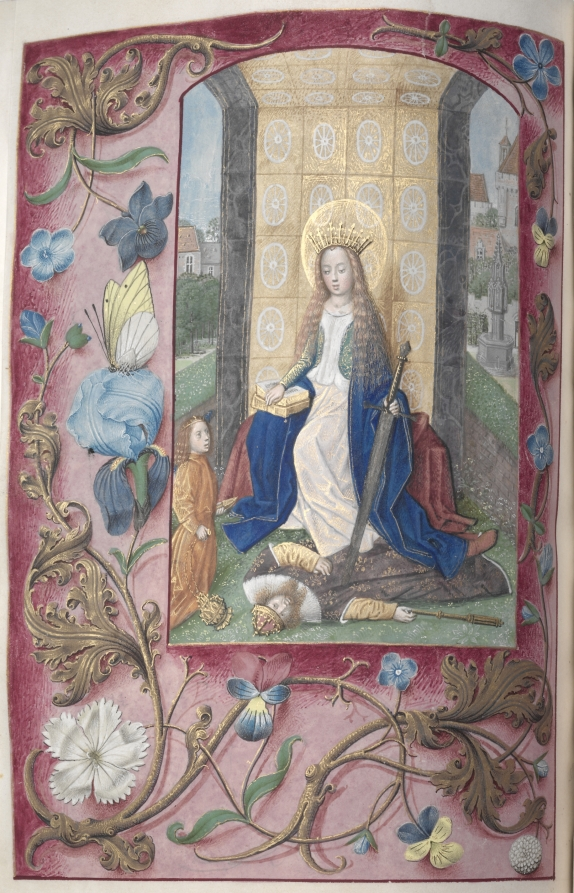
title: Hours of Queen Isabella the Catholic, Queen of Spain: Fol. 189v, St. Catherine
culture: Flanders, Ghent and Bruges, late 15th century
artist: Master of the First Prayerbook of Maximillian (Flemish, c. 1444–1519)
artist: and Associates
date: c. 1500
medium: ink, tempera, and gold on vellum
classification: Bound Volume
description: This manuscript was illuminated by a circle of at least five highly organized manuscript painters active in the Flemish cities of Ghent and Bruges. The principal illuminator was Alexander Bening, who painted the majority of the book's miniatures. Manuscripts produced by this circle of artists are renowned for the decoration of their borders, which typically feature a rich variety of realistically-painted flowers, birds, and butterflies. This prayer book, called a book of hours, was intended not for a cleric, but for the private devotions of a lay person-in this case, Isabella the Catholic, Queen of Spain (1451-1504). Isabella's coat of arms embellishes the book's frontispiece. It is unlikely that the book was commissioned by the Queen herself; rather, she probably received it as a diplomatic gift from someone courting her patronage, perhaps Cardinal Francisco Jimenez de Cisneros. A Franciscan friar, Jimenez was dependent upon Isabella for his advancement, first to the post of Queen's confessor in 1492, and then to Archbishop of Toledo in 1495.